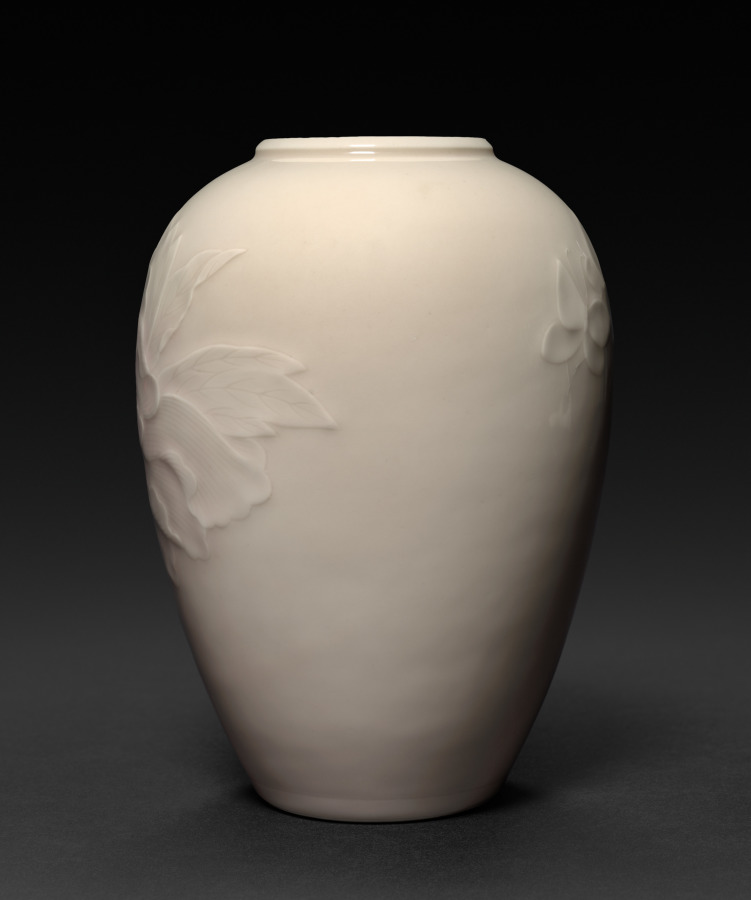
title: Vase with Peonies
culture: Japan, Meiji period (1868–1912)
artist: Seifū Yohei III (Japanese, 1851–1914)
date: 1900–1914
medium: Porcelain with molded and carved design and pink-infused cream glaze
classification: Ceramic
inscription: 清風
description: This flower vase has a creamy white glaze infused with pink. Sadly, the box has been lost, so we cannot know how it was described by the studio. However, through comparison with other works, it is possible to surmise that the work can be categorized as kanpakuji with in-glaze pink. A single huge blossom shoots up into the widest part of the vessel, near the top, so it will be visible from a distance. If this design is displayed in a space with a decorative alcove located some distance away from the entrance, even at a remove, it can announce the taste of its owner and immediately please a guest. On the other side of the vase, two butterflies, their wings overlapping, flit through the sky.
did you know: One of Seifū Yohei III’s most visually impactful techniques was to combine complex low-relief designs in clay surrounded by diffused underglaze blue or pink, which he then covered with a transparent or translucent glaze.